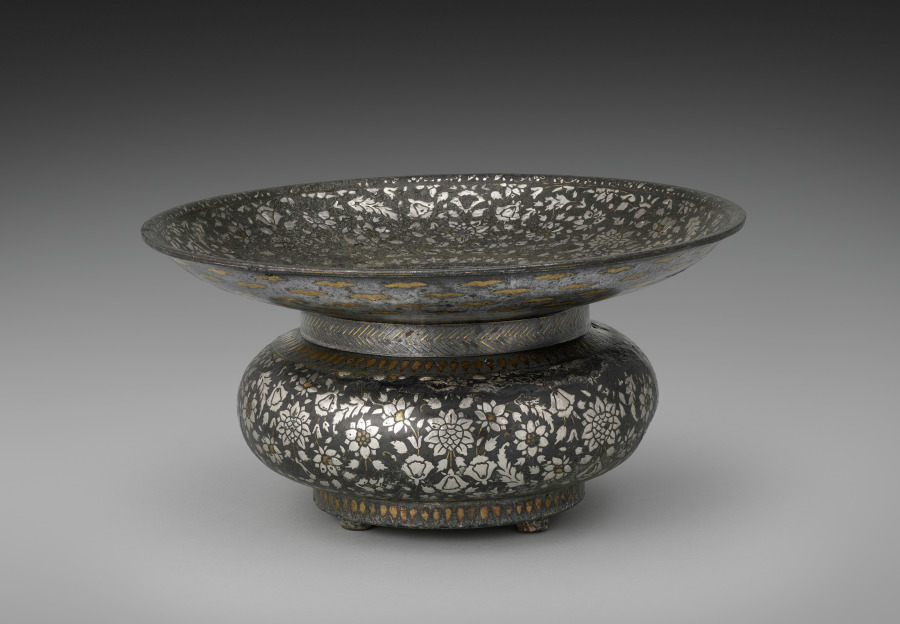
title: Bidri Basin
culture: Southwestern India, Deccan, Karnataka, Bidar​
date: c. 1650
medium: Zinc alloy with silver and brass inlay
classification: Metalwork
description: Wide-rimmed basins called sailabchi were used to catch water poured from a pitcher during hand washing before prayer and before and after meals. A sumptuous example such as this was made for an elite setting. Every element of the allover floral arabesque was cut from silver and brass sheets or wire and hammered into the cast zinc alloy vessel in a distinctive technique developed in southern India.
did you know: Zinc alloy does not rust or corrode, in contrast to steel or copper alloys.